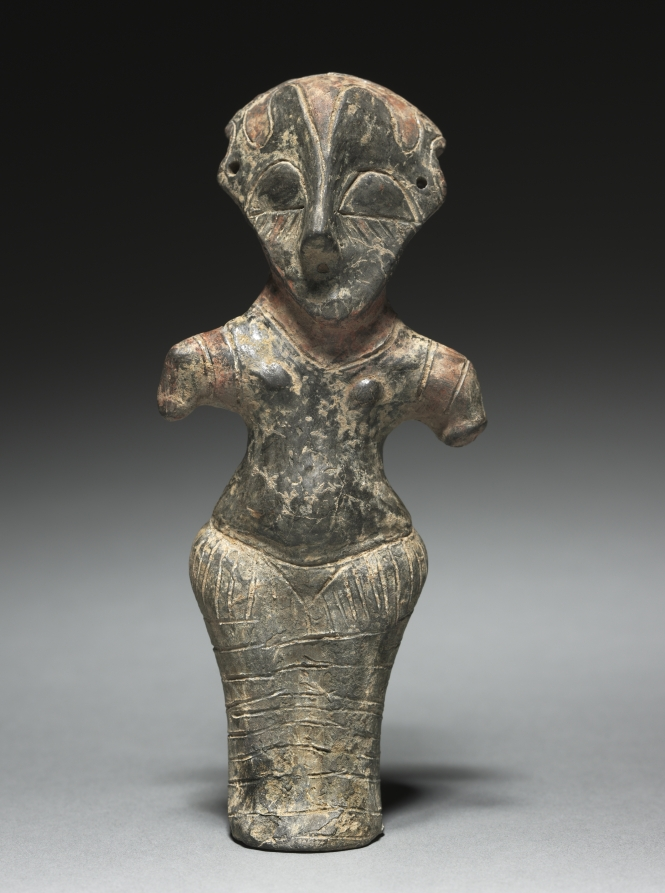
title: Vinca Idol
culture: Serbia, Vinça culture, Neolithic Era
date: 4500–3500 BCE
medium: fired clay with paint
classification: Ceramic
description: This statuette, probably a cult idol, dates to the Neolithic Era which saw the development of farming and human technology. It is extraordinarily well preserved and derives from the settlement at Vinca in modern Serbia. This flourishing culture was the largest known in Europe at that time, extending along the Danube into the Balkans and Central Europe. Thousands of clay statuettes have been discovered in the region's Vinca settlements suggestive of the intense magic-religious practices within the Vinca culture. This statuette is anthropomorphic, or human-shaped, and is presumed to have been used for ritual purposes. The use of red paint is typical of Vinca Neolithic figurines, and few have survived in such excellent condition.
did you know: If you look closely, you can see remnants of red pigment on this diminutive figure.